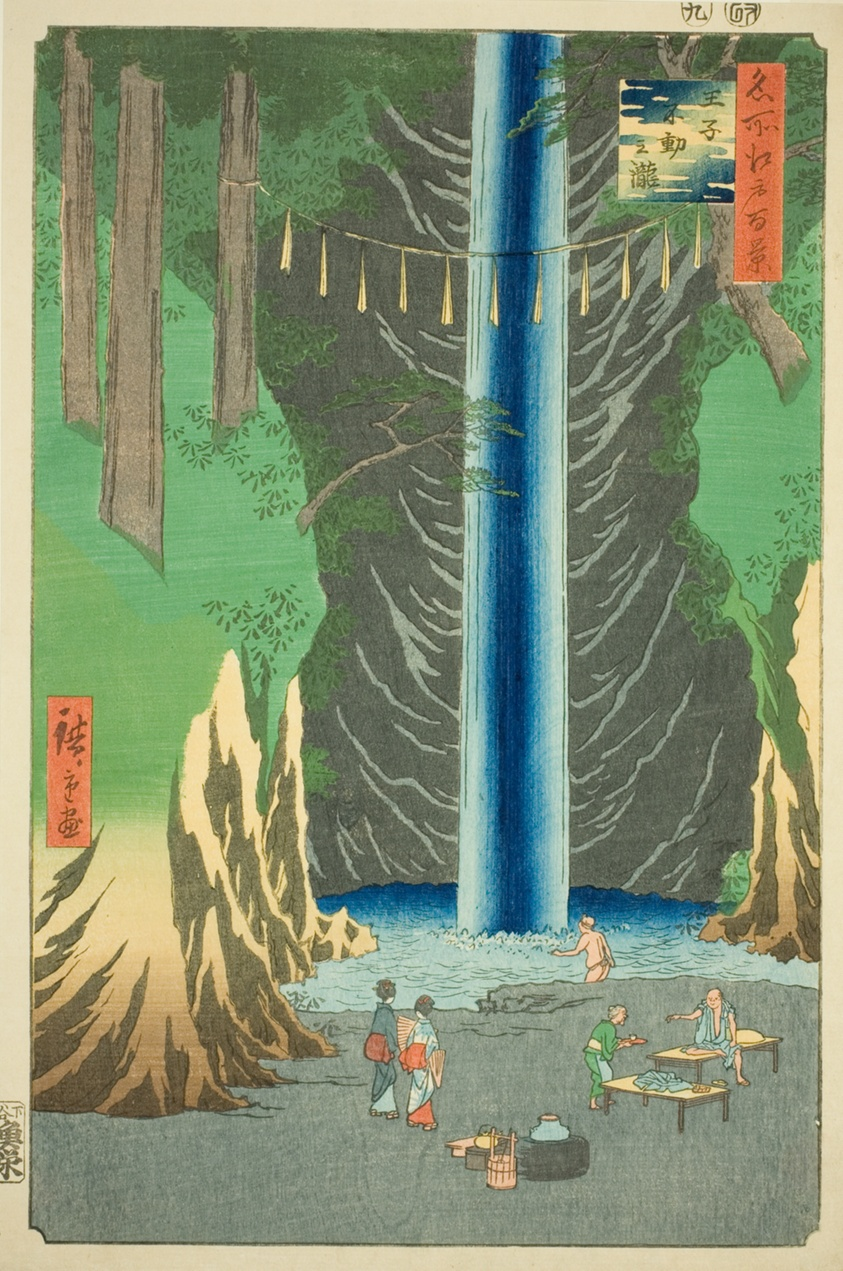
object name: Print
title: Fudo Falls at Oji (Oji Fudo no taki), from the series "One Hundred Famous Views of Edo (Meisho Edo hyakkei)"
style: Japanese (culture or style)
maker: Utagawa Hiroshige 歌川 広重; Japanese, 1797-1858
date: 1857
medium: Color woodblock print; oban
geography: Japan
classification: woodblock print; print; asian art